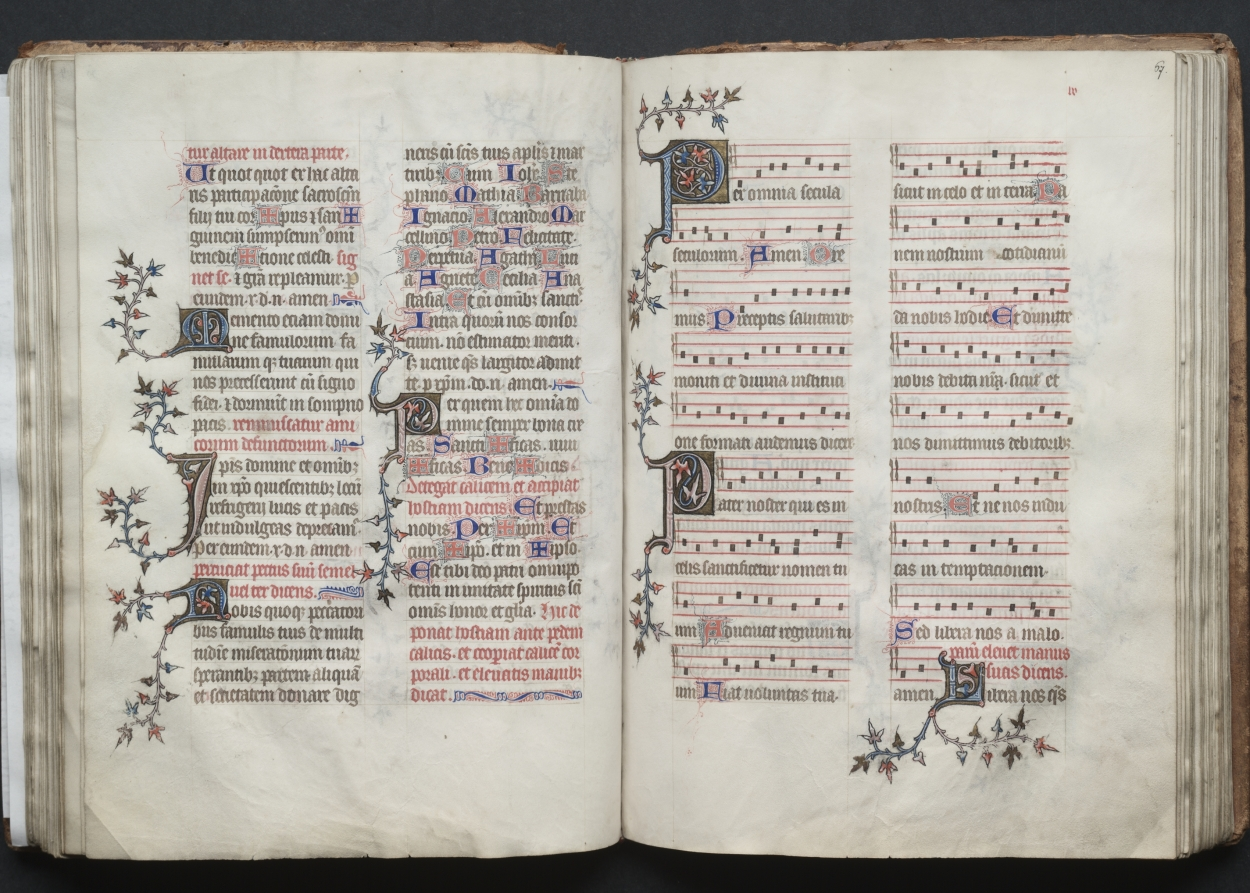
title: The Gotha Missal: Fol. 67r, Text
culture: France, Paris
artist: Master of the Boqueteaux (French)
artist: and Workshop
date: c. 1375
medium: ink, tempera, and gold on vellum; blind-tooled leather binding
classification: Bound Volume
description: The style and quality of this manuscript's decoration is typical of deluxe Parisian books made for aristocratic or royal patrons. Most of the book's decoration appears to be the work of the Master of the Boqueteaux, an artist active at the court of King Charles V (died 1380). His style was apparently shared by a number of book illuminators working in and around Paris. It is very possible that the Gotha Missal belonged to Charles V, but is not provable because the manuscript has no royal portraits and lacks a colophon. Given the book's magnificent decoration, however, it would seem that it was produced for a Valois prince, if not for the king himself. The manuscript receives its name from the German dukes of Gotha, its later owners.